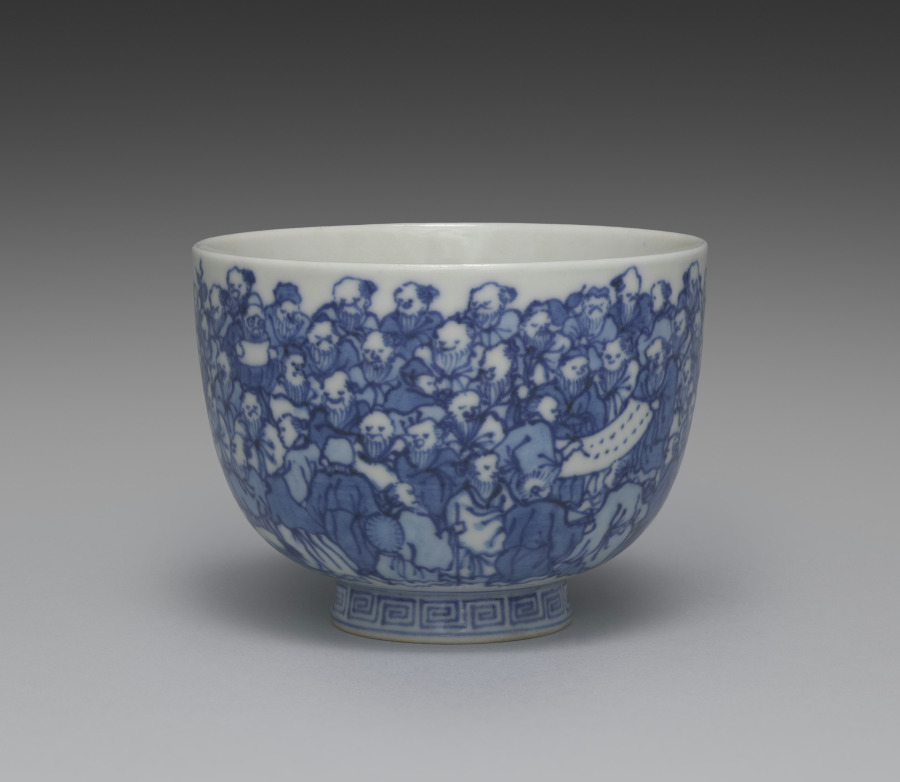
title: Teacup from Teacups with a Hundred Sages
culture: Japan, Meiji period (1868–1912)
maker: Seifū Yohei III (Japanese, 1851–1914)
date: 1893–1914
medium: One from a set of five teacups; porcelain with underglaze blue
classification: Ceramic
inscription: 清風造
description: Each of these five teacups has a painting of identical design in underglaze blue, but as the tiny figures are drawn entirely by hand, each cup has its own personality. The theme of the sencha cups is an assembly of sages or immortals, literally “a hundred venerable [people]” (hyakurō). The myriad figures crowd the scene in groups. The god of longevity, with his tall forehead, sits with his cranes, having flown in from Mt. Penglai on the Isle of the Immortals. Seven long-bearded sages sit around a stone table, chatting and drinking; one is seated on an enormous gourd. Of course, there is a stack of books on the table, and elsewhere, scrolls are being written upon or read—in one case held very close by a sage who is wearing glasses. The design was enormously popular in ceramics made for those engaged in literati culture.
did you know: Seifū Yohei III (1851–1914) produced many works for tea gatherings where people drank Chinese-style leaf-tea (sencha).